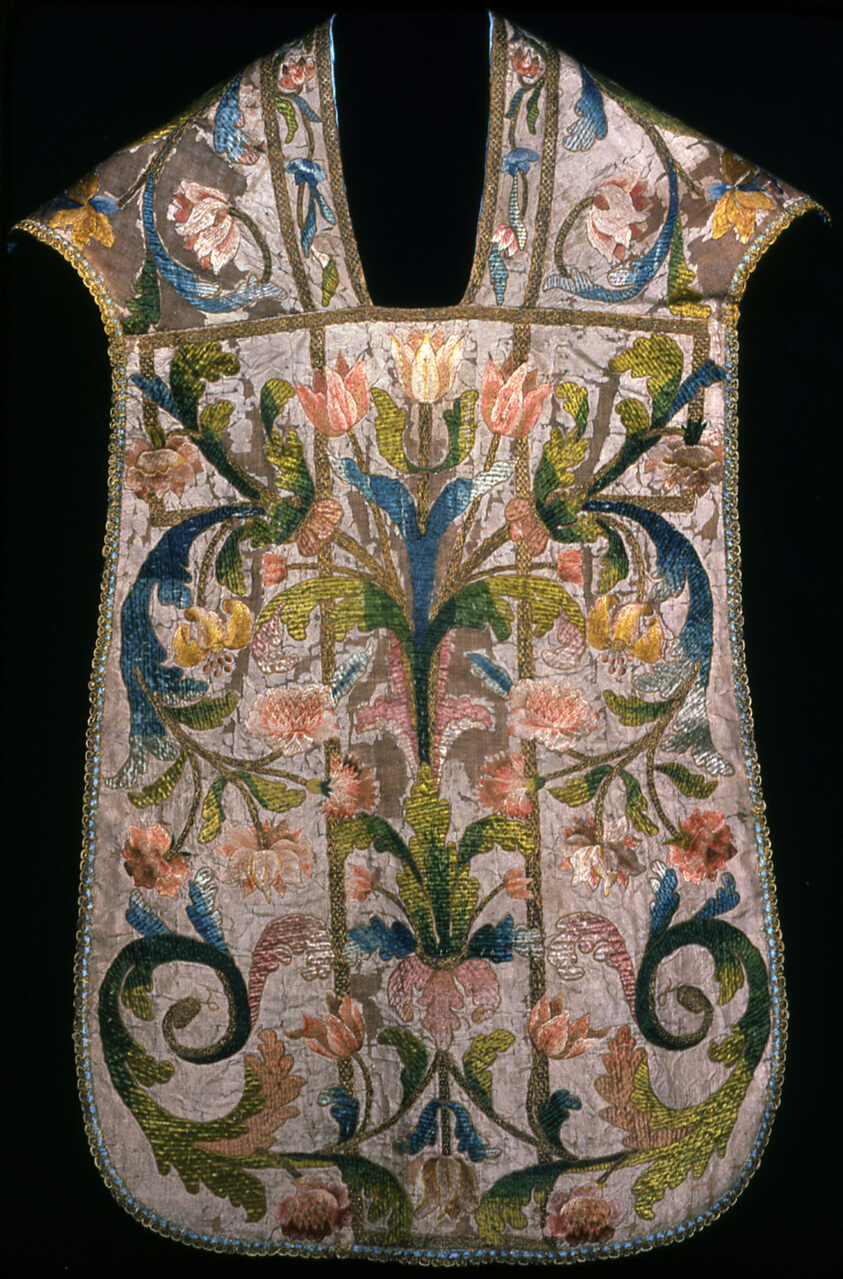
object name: Costume and Accessories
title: Chasuble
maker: Italy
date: 18th century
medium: Silk, plain weave; embroidered with silk floss, silk-wrapped linen, and gilt-metal-strip-wrapped silk in satin stitch; couching; edged with silk, bobbin-made tape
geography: Italy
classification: textile; costume; chasuble; needlework (visual works); liturgical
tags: flowers, yellow (color), tulips, scrolls (motifs), pink (color), peonies, lilies, green (color), foliage, crosses, blue (color)